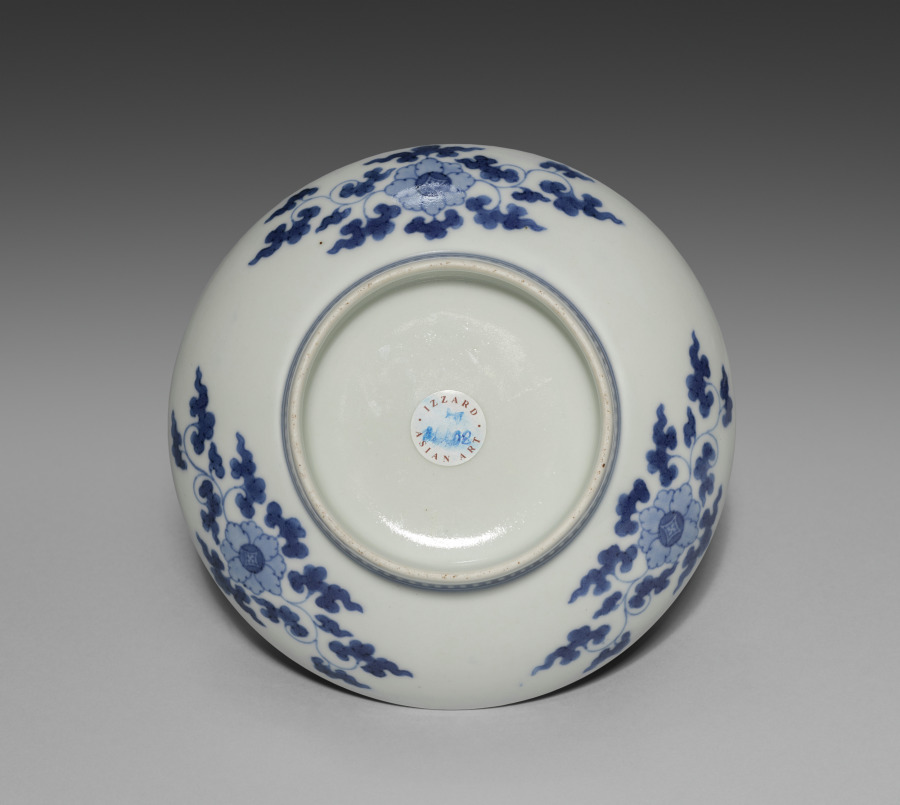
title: Small Dish (Kozara) with Cherry Blossoms in Baskets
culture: Japan, Edo period (1615–1868)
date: c. 1670‒1710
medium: Porcelain with underglaze blue and overglaze color enamel (Hizen ware, Nabeshima type)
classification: Ceramic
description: The cherry blossoms and stylized wave pattern that appear on this dish remain popular today.